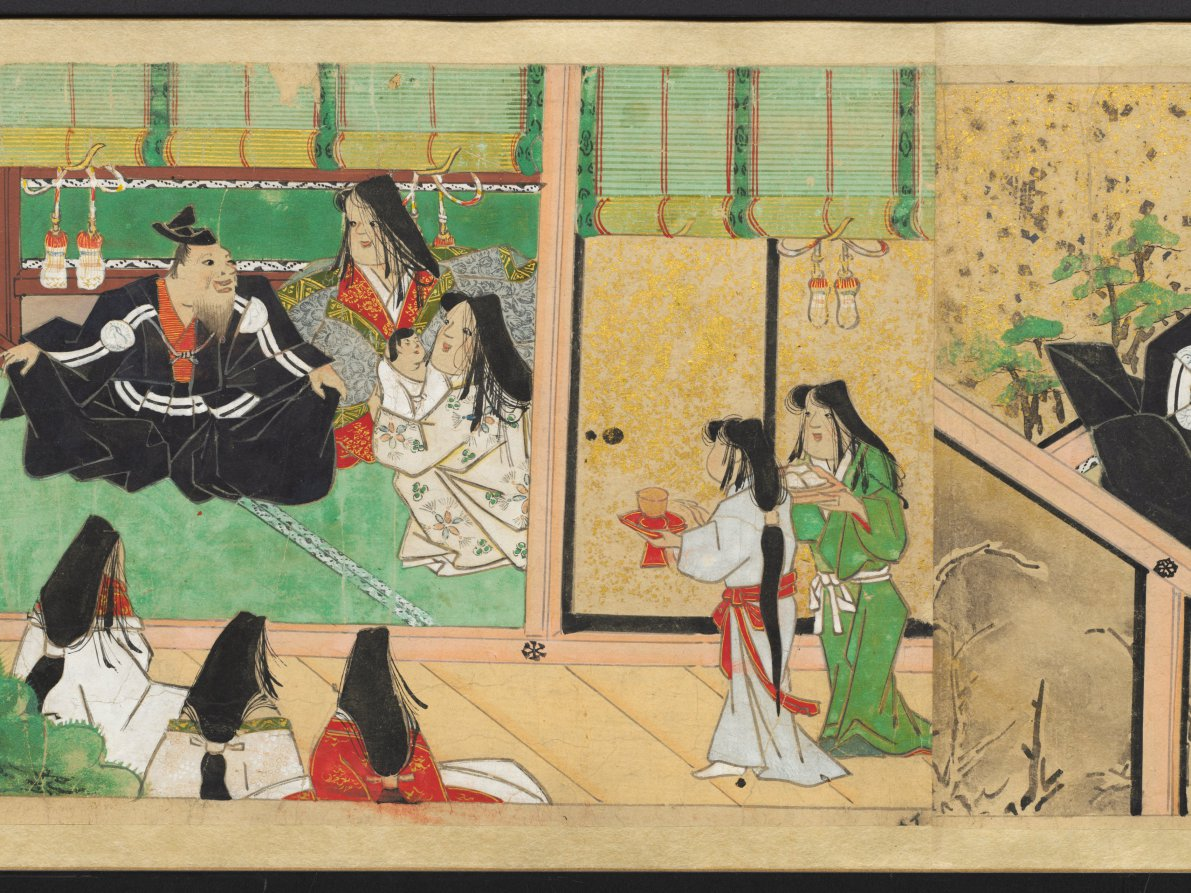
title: The Saltmaker's Story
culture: Japan, Edo period (1615–1868)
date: early 1600s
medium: One of a pair of handscrolls; ink, color, and gold on paper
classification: Painting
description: Once read and copied by girls at New Year’s celebrations and included in dowries, The Saltmaker’s Story is a rags-to-riches tale in which daughters are gifts from the gods. Despite his simple outlook, the main character progresses from humble roots as an associate at Kashima Shrine to the elite status of grandfather of the emperor through the intervention of the Kashima deity. The Saltmaker’s Story is traditionally presented in a set of three scrolls, but the text of this set has been removed by a previous owner, who remounted the illustrations as a pair. The paintings of this one take us from right to left through the first half of the tale.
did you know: This handscroll originally had texts before its paintings, but the texts were removed.